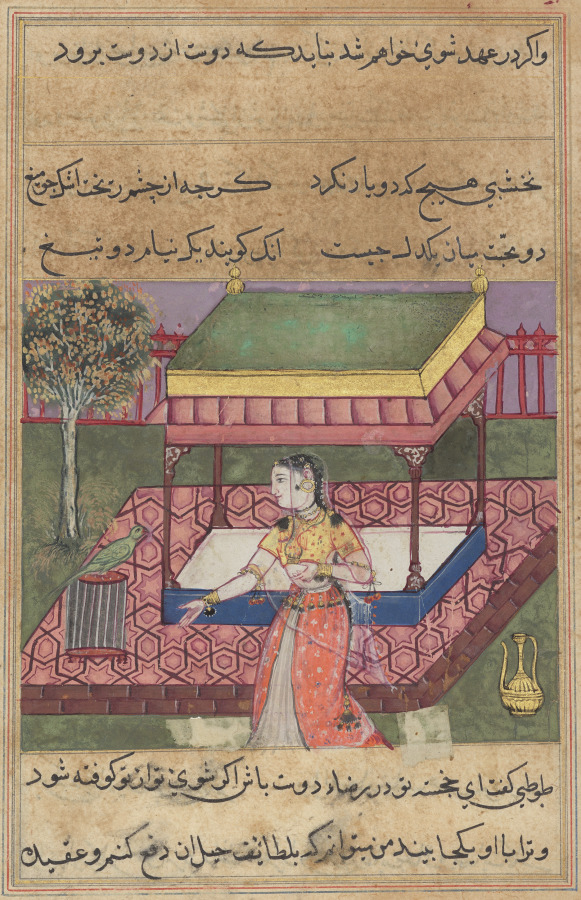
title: The parrot addresses Khujasta at the beginning of the fortieth night, from a Tuti-nama (Tales of a Parrot)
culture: Mughal India, court of Akbar (reigned 1556–1605)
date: c. 1560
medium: gum tempera, ink, and gold on paper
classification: Painting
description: As Khujasta prepares to leave to spend the night with her lover, she is stopped by Tuti the parrot. Tuti begins to tell her the story of a merchant’s wife, named Shahr-Arai, who tricked her husband in order to carry out an affair. The story is set in Nishapur, a city in northeast Iran.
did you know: A highly corrosive copper green pigment, called verdigris, has darkened and damaged the paper.